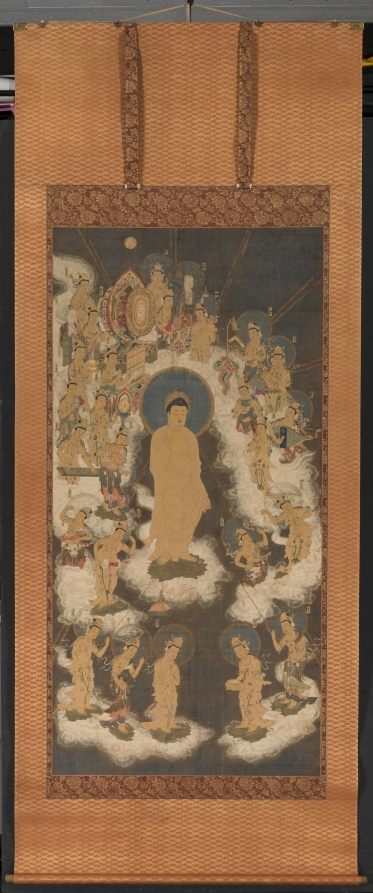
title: Welcoming Descent of Amida (Amida Raigō)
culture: Japan, Kamakura period (1185–1333)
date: 1300–1333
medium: hanging scroll; ink, color and gold on silk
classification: Painting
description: In the Pure Land school of Buddhism, Amida Buddha is the focus of worship. Pictured here is the raigō, or the moment when Amida descends with his retinue to welcome a dying person into his Pure Land, called the Western Paradise. Once there, a person can concentrate on becoming enlightened. Images like this one could be placed before a person on their deathbed to help them stay faithful and motivated to attain birth in the Pure Land.